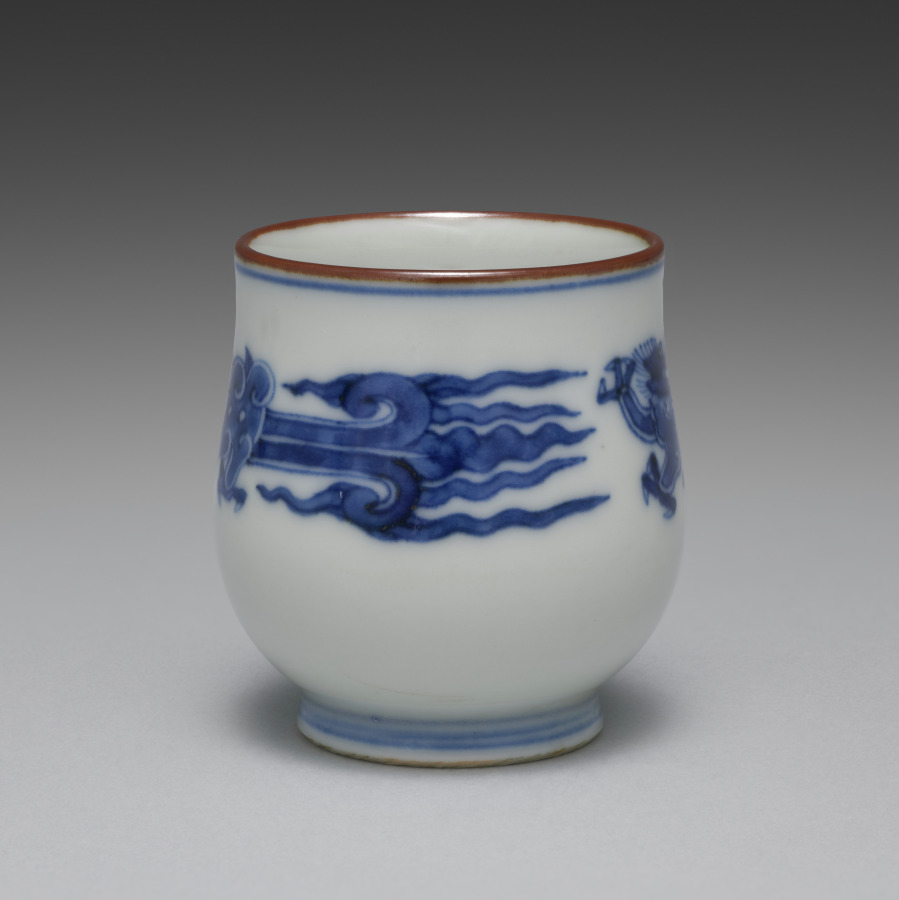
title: Cup from Sake Cups with Dragons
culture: Japan, Meiji period (1868–1912)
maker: Seifū Yohei III (Japanese, 1851–1914)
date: c. 1893–1914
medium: One from a set of six sake cups; porcelain with underglaze blue and iron oxide rims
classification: Ceramic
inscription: 大日本清風造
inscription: 清風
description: Each of these sake cups pictures two backward-looking dragons. The highly stylized creatures resemble jade carvings.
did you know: Seifū Yohei III was inspired by the Chinese mythical animals that were common on porcelain objects made at Jingdezhen in China during the Ming dynasty (1368–1644) and then exported around the world.